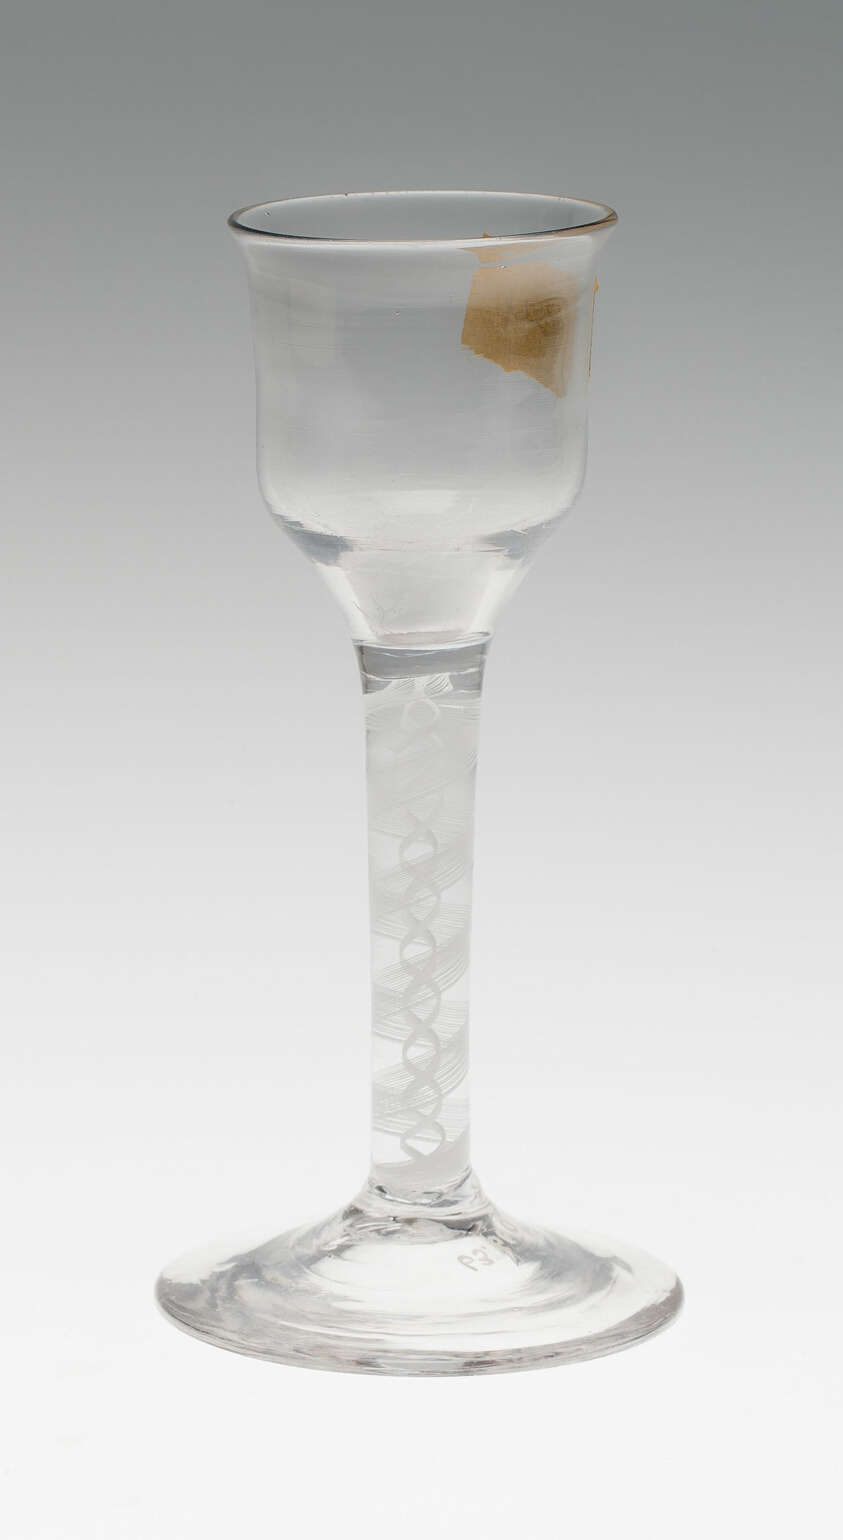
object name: Glass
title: Wine Glass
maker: England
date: c. 1760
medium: Glass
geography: England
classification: drinking vessel; glass; european decorative arts